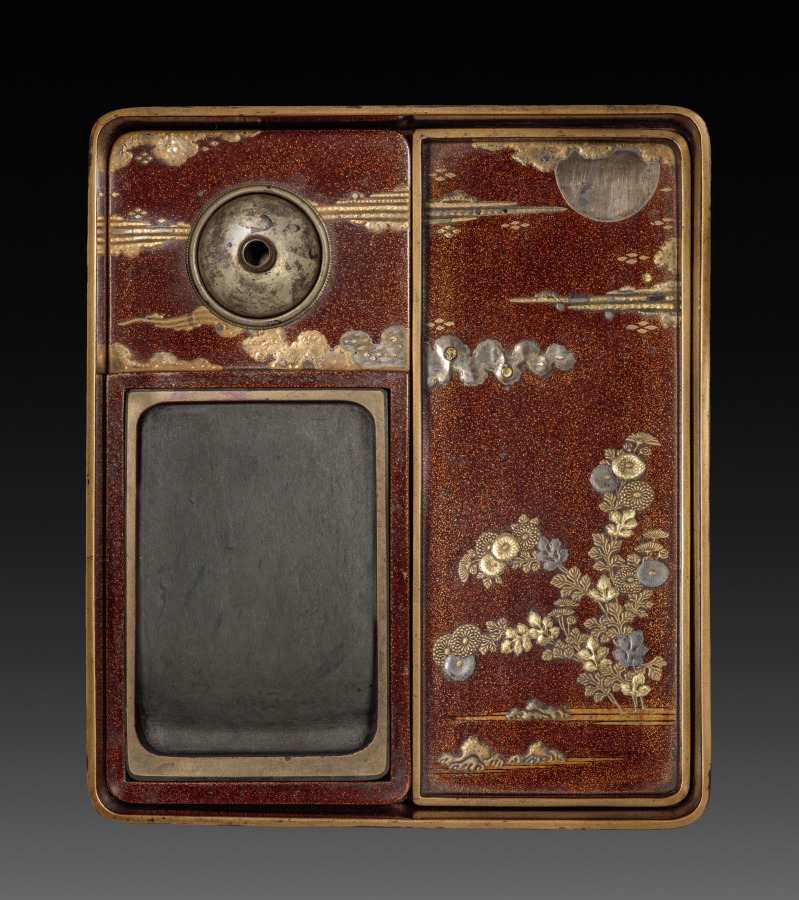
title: Writing Box (Suzuribako) with Phoenix in Paulownia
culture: Japan, Momoyama period (1573–1615)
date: late 1500s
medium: Lacquer on wood with sprinkled gold and silver powder (maki-e) and gold and silver foil application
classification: Lacquer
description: The only place the mythical phoenix will perch is in the paulownia tree. Along with the dragon, the bird is a symbol of imperial power in East Asia. This box––a container for an inkstone, brushes, and ink––is both functional and lavish, its dramatic effects achieved with a pear-skin ground decoration (nashiji) and sprinkled powder decoration in high relief (takamaki-e).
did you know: In contrast to the bright, celebratory motifs on the exterior, the interior of the box invites a more reflective mood with its autumn moonlit sky over chrysanthemums.